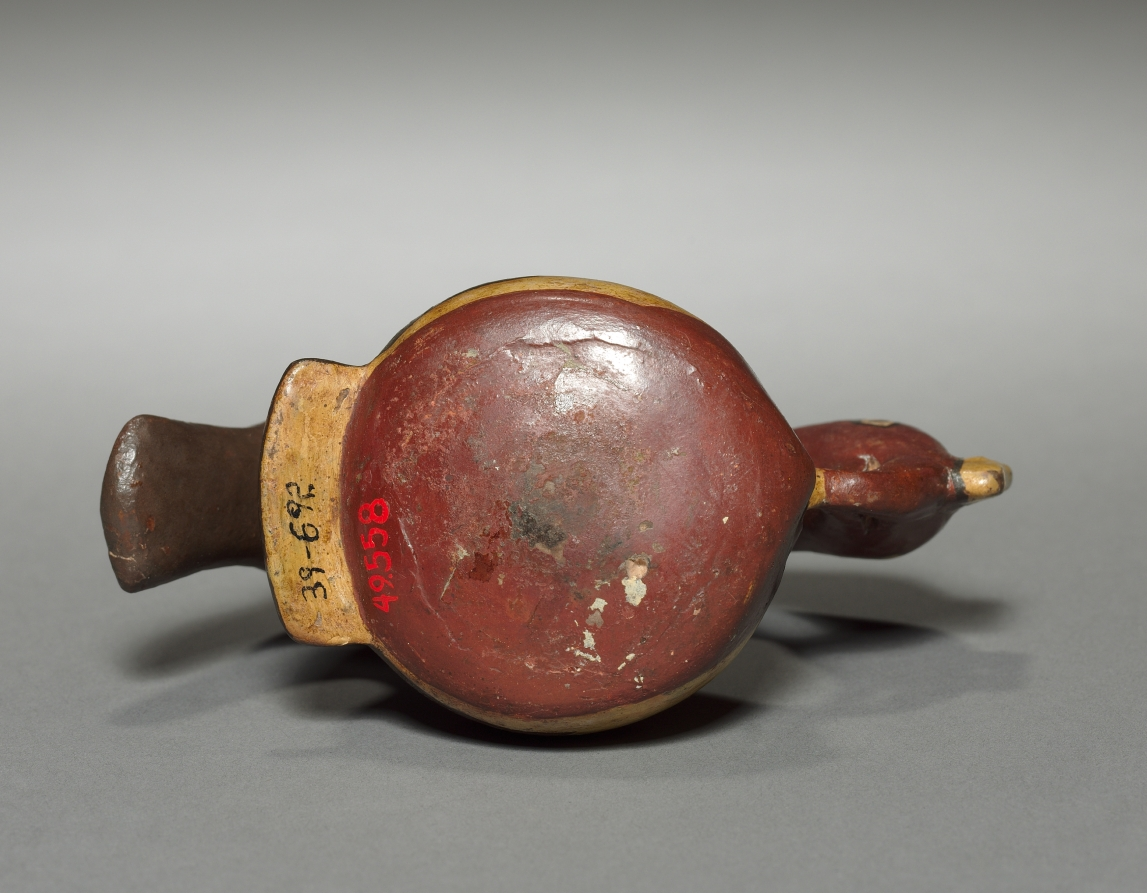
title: Vessel with Condor and Human Head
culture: Peru, Tiwanaku style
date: 400–1000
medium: pottery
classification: Ceramic